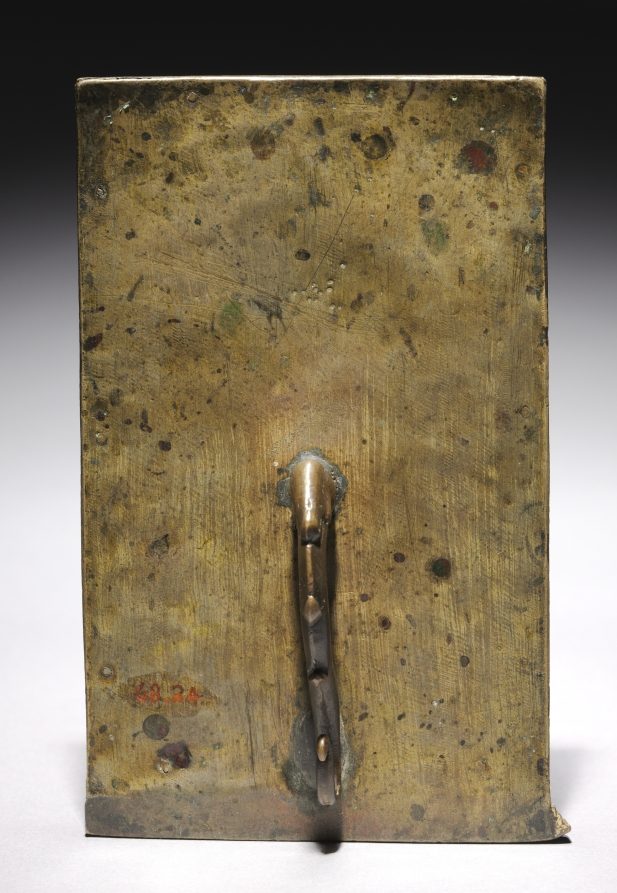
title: Pax with the Madonna and Child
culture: Italy, Florence, 15th century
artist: follower of Antonio Rossellino (Italian, 1427–1479 )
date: 1400s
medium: gilt bronze, silver, and blue enamel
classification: Sculpture